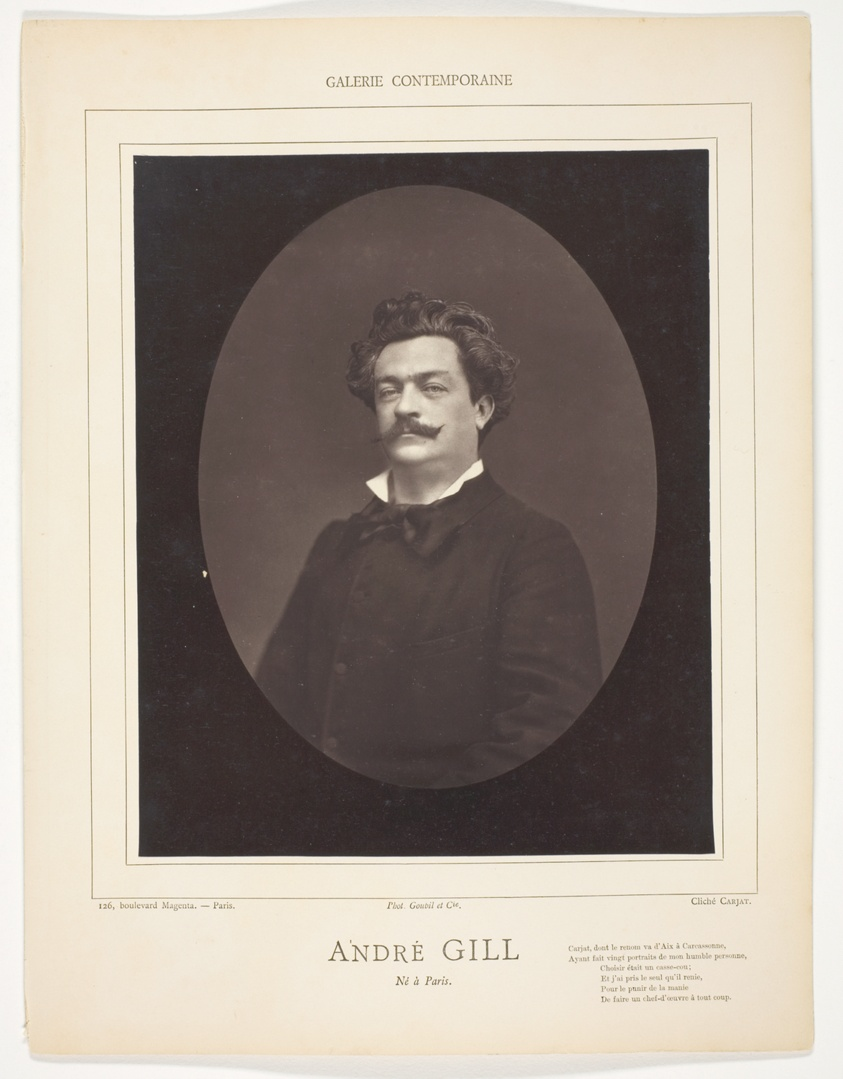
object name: Photograph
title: André Gill (French caricaturist, 1840-1885)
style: 19th century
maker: Étienne Carjat; French, 1828–1906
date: c. 1876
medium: Woodburytype, from the periodical “Galerie Contemporaine Littéraire, Artistique” (1878), volume 6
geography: France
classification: woodburytype; photomechanical process; photography; photograph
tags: Collected by Hugh Edwards, Paris, Contemporaine Littéraire